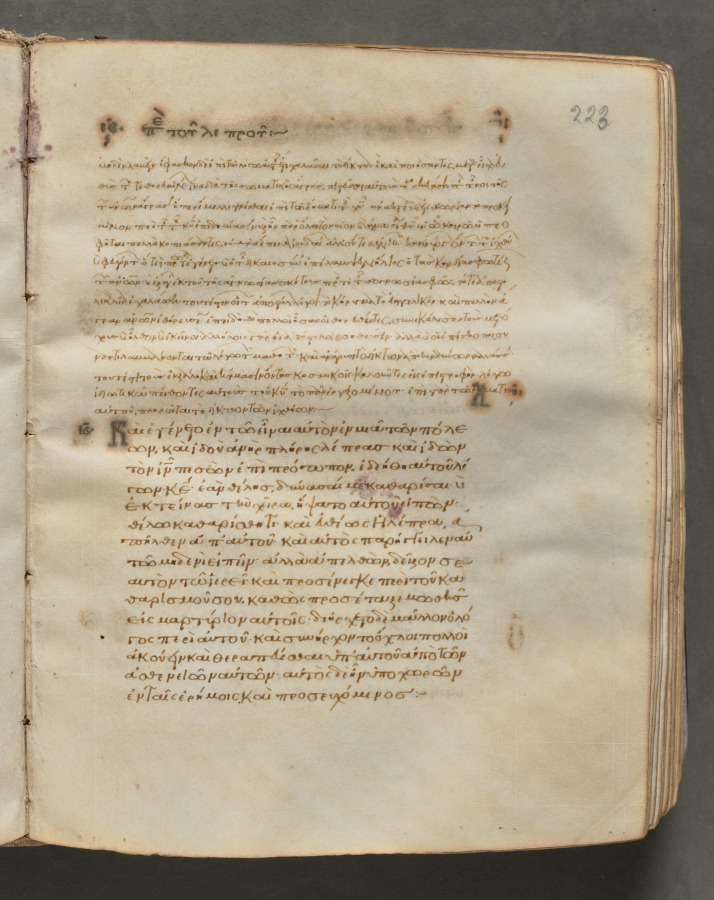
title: Text, folio 223 (recto), from a Gospel Book with Commentaries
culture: Byzantium, Constantinople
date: c. 1000–1100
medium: ink, tempera, and gold on vellum; leather binding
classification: Bound Volume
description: Each of the four gospels in this book opens on a page with brilliantly illuminated borders depicting the author of the text as well as birds-principally peacocks, symbols of the immortality of the soul-and fountains, representing the fountain of life and the salvation of the soul. This volume consists of 428 leaves with texts in Greek. Its level of sophistication suggests that it was probably written and decorated in a monastery in Constantinople.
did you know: Gospel Books were carried in procession through Byzantine churches.